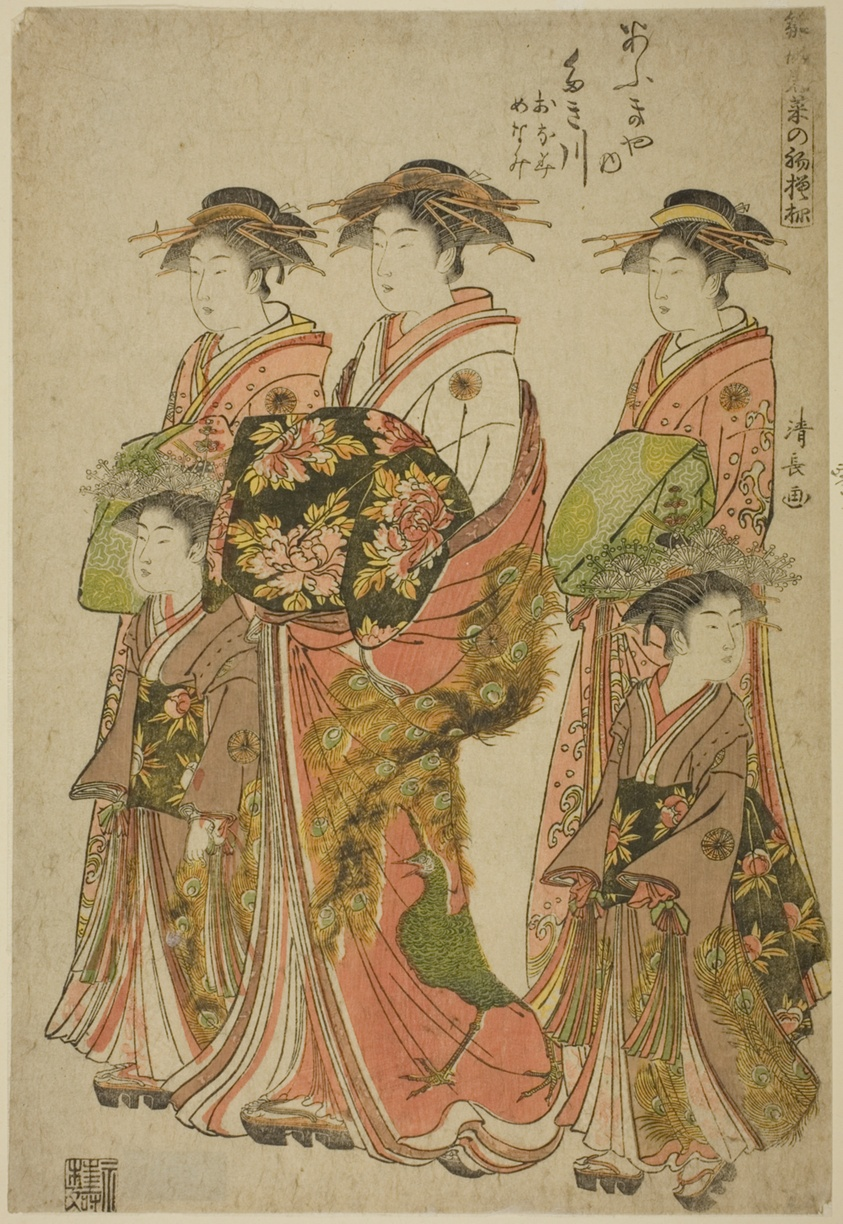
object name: Print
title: The Courtesan Takigawa of the Ogiya with Her Attendants Onami and Menami, from the series "Models for Fashion: New Designs as Fresh as Young Leaves (Hinagata wakana no hatsu moyo)"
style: Japanese (culture or style)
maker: Torii Kiyonaga (Japanese, 1752-1815)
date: 1783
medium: Color woodblock print; oban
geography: Japan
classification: woodblock print; print; asian art